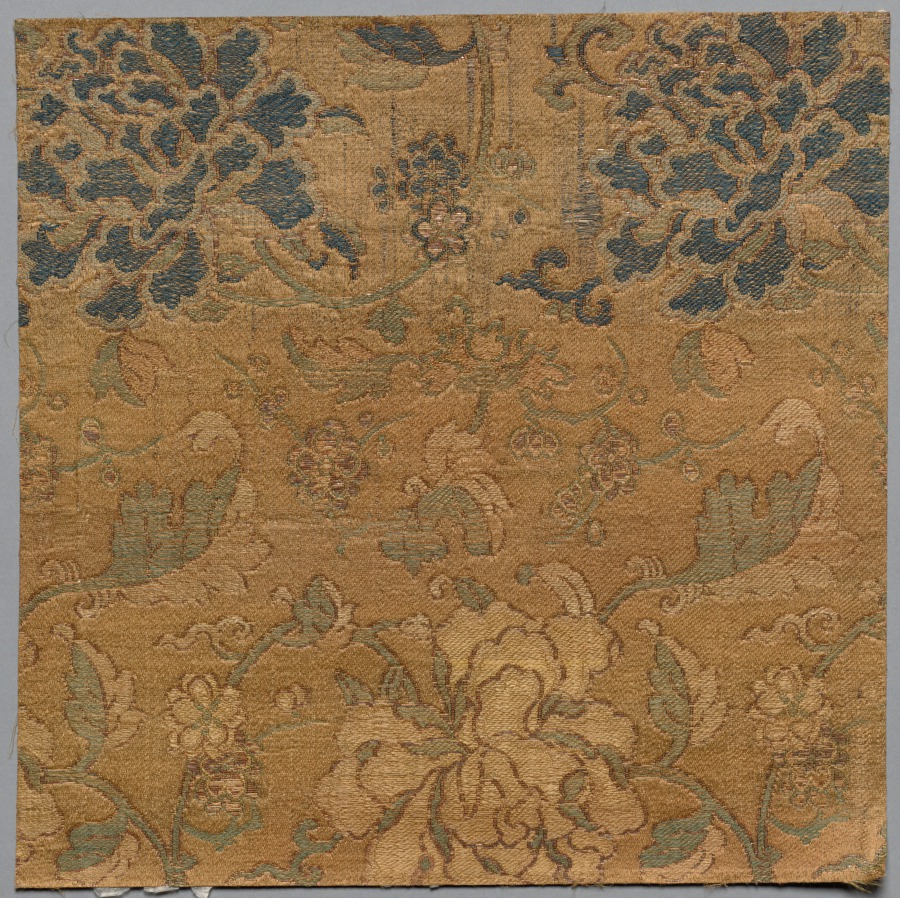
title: Fragment from Book of Textiles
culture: China, Qing dynasty (1644-1911)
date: 1700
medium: silk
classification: Textile